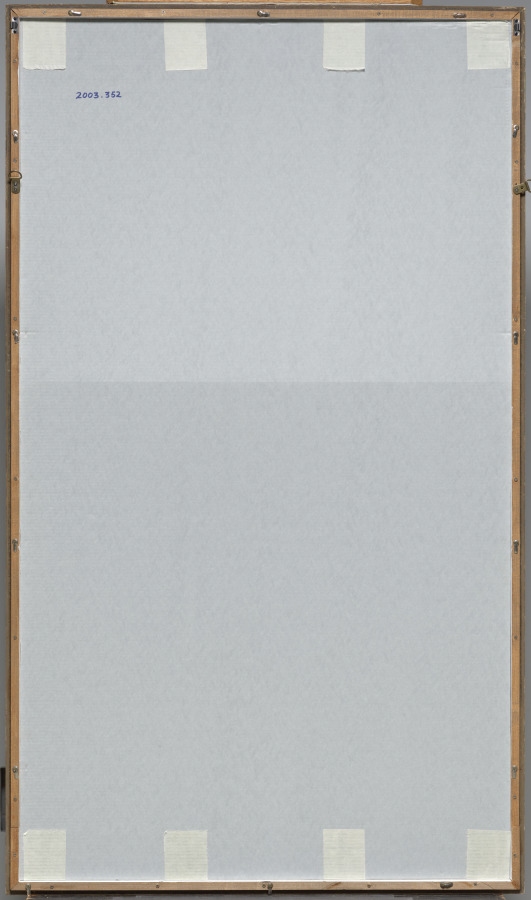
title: Lineage Portrait of Buddhist Monks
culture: China, Qing dynasty (1644–1911)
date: 1600s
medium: hanging scroll mounted on a panel (framed); ink, color, and gold on paper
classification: Painting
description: This painting features 24 Buddhist priests, likely of several generations and members of the same temple or school. The priests are depicted with attention to individual features and appearances, dressed in their formal garments. They may represent monks of the Ōbaku school, a form of Chan (Japanese: Zen) Buddhism founded in Japan by Chinese émigré monks and their Japanese followers.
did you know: The painting has remnants of a Japanese mounting, indicating that it was once kept in Japan.